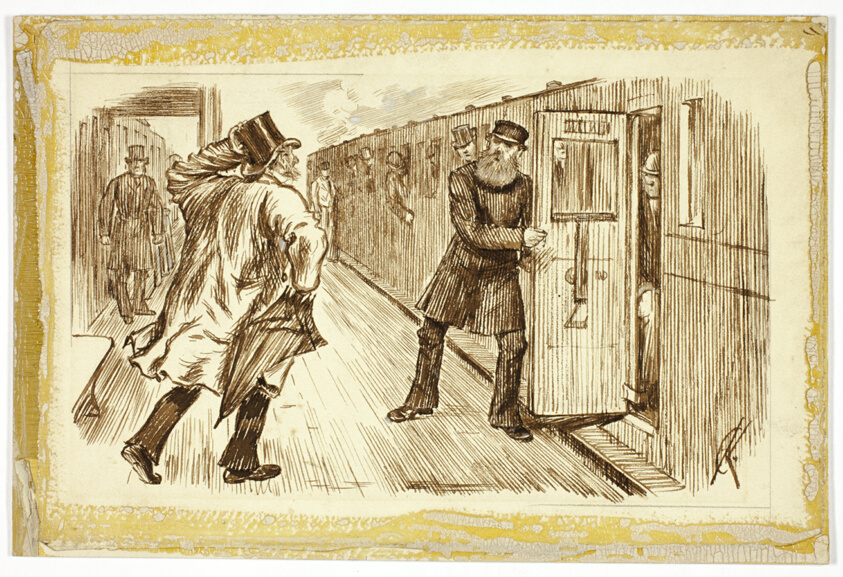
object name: Drawing and Watercolor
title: Man Catching Train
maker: Attributed to Charles Samuel Keene; British, 1823-1891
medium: Pen and brown ink on cream wove paper, laid down on card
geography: England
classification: pen and ink drawings; drawings (visual works); prints and drawing